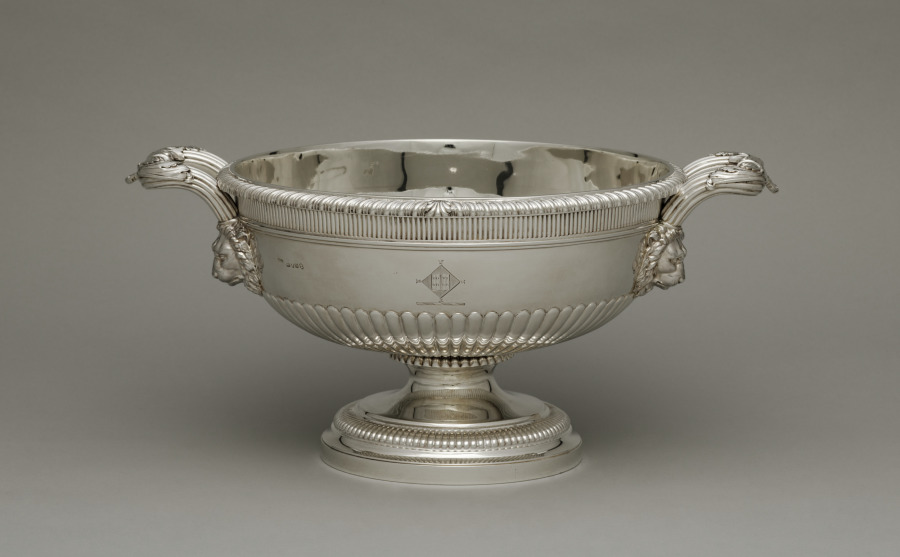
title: Tureen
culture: England, London, 19th century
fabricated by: Paul Storr (British, 1771–1844)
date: 1812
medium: silver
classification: Silver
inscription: coat of arms: Hutton impaling Chaytor; crest: Hutton. (Arms of Timothy Hutton (1729-1864) of Marske and Clifton Castle, Yorkshire, and his wife Elizabeth Chaytor of Spennithorne Hall, who were married in 1804.)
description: Silver fulfilled a prominent role in projecting wealth, status, power, and ritual in British life during the 1600s and 1700s. Elaborate forms such as this tureen, with its acanthus leaves and fluted detailing, not only represented wealth in its sheer silver weight but also provided royal and aristocratic owners a surface for displaying engraved coats of arms. The arms of the High Sheriff of Yorkshire, Timothy Hutton and his wife Elizabeth Chaytor of Spennithorne Hall in northern England are engraved on this tureen by Paul Storr, one of the most prominent London silversmiths of the period.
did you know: This tureen is accompanied by a cover and stand. See cover record.